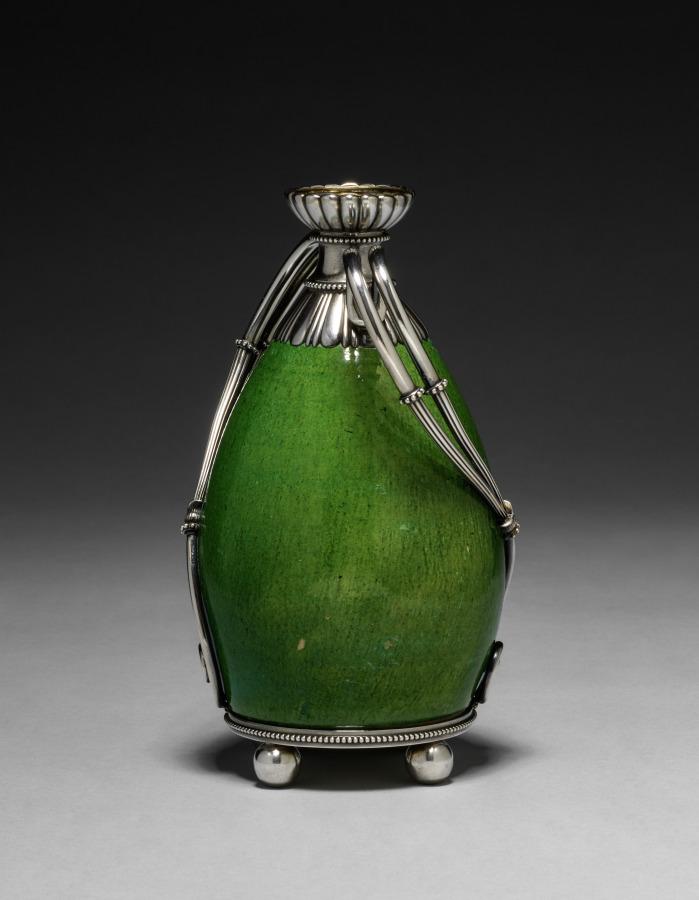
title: Vase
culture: Russian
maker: House of Fabergé (Russian, 1842–1918)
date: c. 1890–99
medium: ceramic, silver-gilt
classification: Ceramic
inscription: Inscribed “K. Fabergé” in Cyrillic, surmounted by the double headed Imperial eagle.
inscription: “88” silver standard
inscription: St. Petersburg coat of arms (St. George and the dragon)